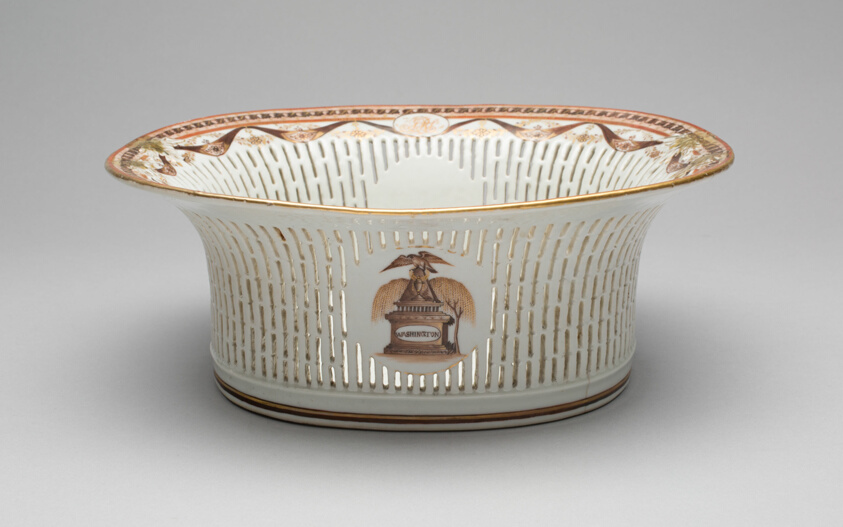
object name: Ceramics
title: Basket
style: chinese export, Chinese (culture or style), East Asian, asian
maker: China; Chinese, made for the American market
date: c. 1800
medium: Porcelain, enamel, and gilding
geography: China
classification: chinese export porcelain; art of the americas; porcelain; european decorative arts; ceramics; decorative arts; American market; pottery